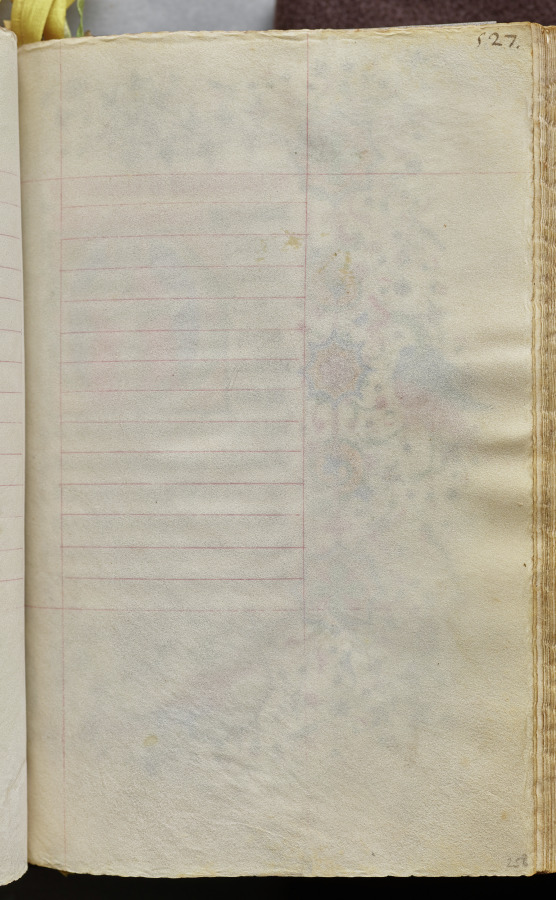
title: Hours of Charles the Noble, King of Navarre (1361-1425): fol. 258r, Text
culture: France, Paris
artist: Master of the Brussels Initials and Associates (French)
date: c. 1405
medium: ink, tempera, and gold on vellum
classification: Bound Volume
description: This precious volume was obviously highly prized by its owner, the French-born King of Navarre, who had his coat of arms painted on no less than twenty folios. Rather than directly commissioning this manuscript from a specific workshop, it seems that Charles the Noble acquired his book of hours -- perhaps ready-made for the luxury market -- while on a trip to Paris in 1404-05. A collaborative effort, six painting styles are evidenced within the pages of this codex, those of two Italians, two Frenchmen, and two Netherlanders. The painter who was responsible for the planning and decoration of the book, and who produced seventeen of the large miniatures, was a Bolognese artist known as the Master of the Brussels Initials. His principal assistant, responsible for most of the borders, was a Florentine who signed his name "Zecho" da Firenze on folio 208 verso.